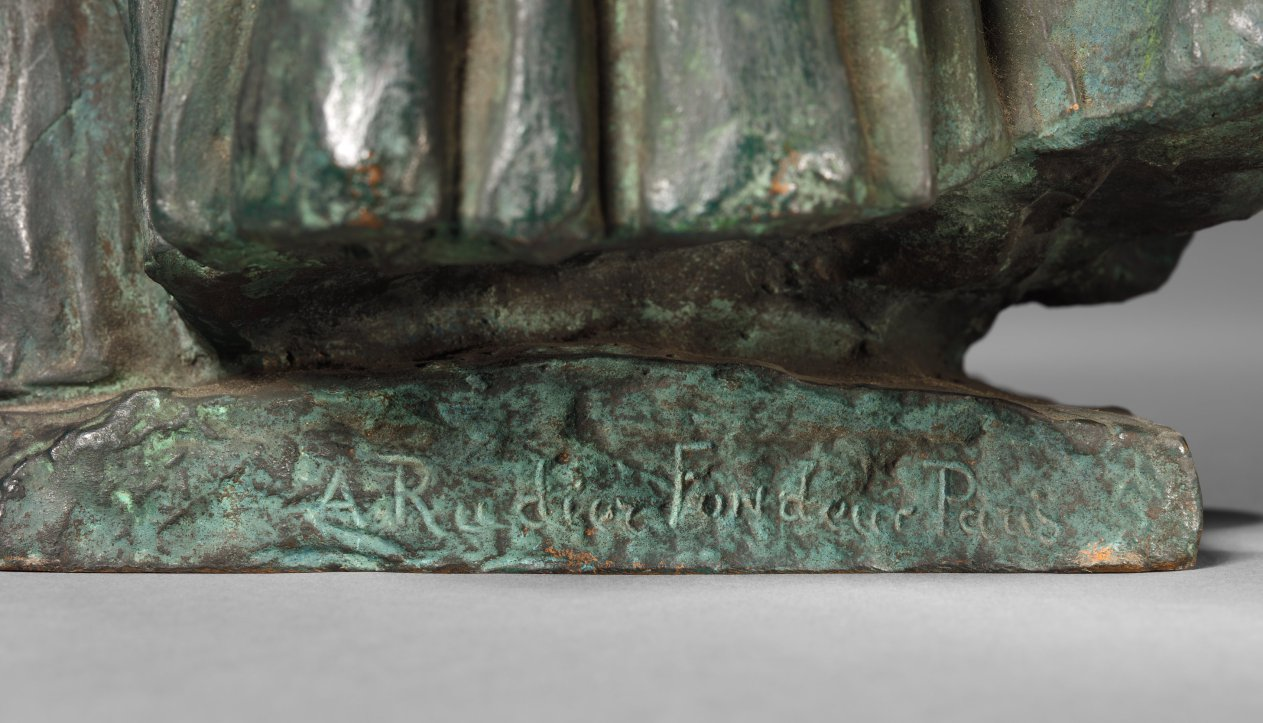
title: Loïe Fuller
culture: France, 19th-20th century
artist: Pierre Roche (French, 1855–1922)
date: c. 1900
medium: bronze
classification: Sculpture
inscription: Inscribed on the face of the base: "Loïe Fuller" and at the right, signature of the artist